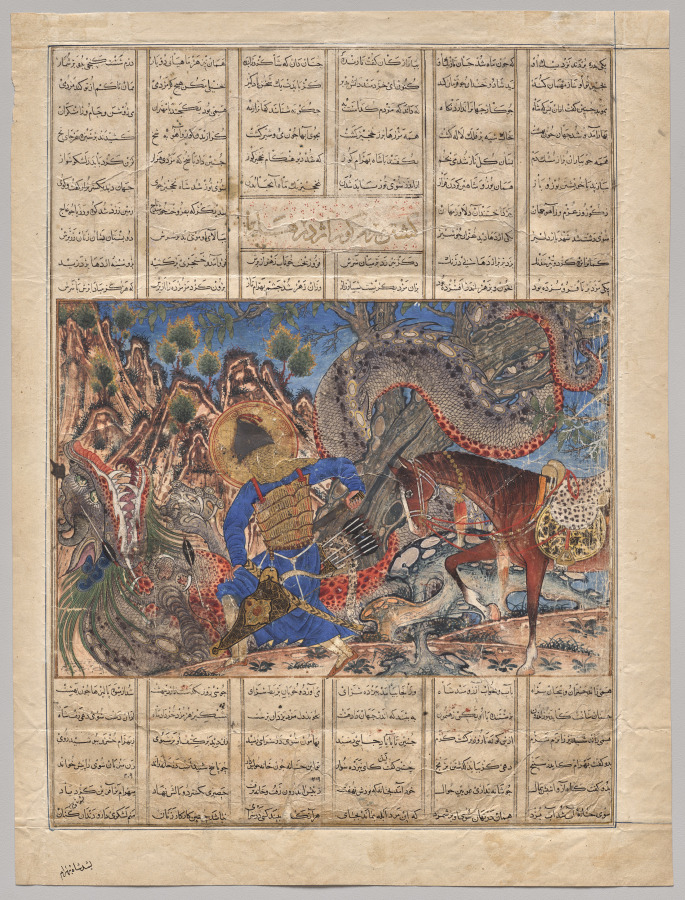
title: Bahram Gur Slays a Dragon (verso), from a Shahnama (Book of Kings) of Firdausi (940–1019 or 1025), known as the Great Mongol Shahnama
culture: Iran, Tabriz, Ilkhanid period (1256-1353)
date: 1330–35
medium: opaque watercolor, ink, and gold on paper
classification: Manuscript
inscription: Script: Naskh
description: In this intense painting, Bahram Gur plunges his sword into the breast of a dragon. A favorite character from Iran's pre-Islamic history, Bahram Gur (reigned 420–38 CE) was a popular ruler of the Sasanian dynasty and a great hunter. He took the name "Gur," meaning onager (a wild ass), because it was his preferred game, although he also excelled at killing dragons. As evidenced by this illustration's rock formations, tree trunk, and dragon, Iranian painting in the Mongol period borrowed numerous stylistic and spatial elements from Chinese models. With the surging landscape and writhing dragon rendered with equal energy, this is a picture of extraordinary unity and concentration.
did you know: The monumental Great Mongol Shahnama was commissioned by a ruler of the Ilkhanid dynasty, which governed the southwestern part of the Mongol Empire.